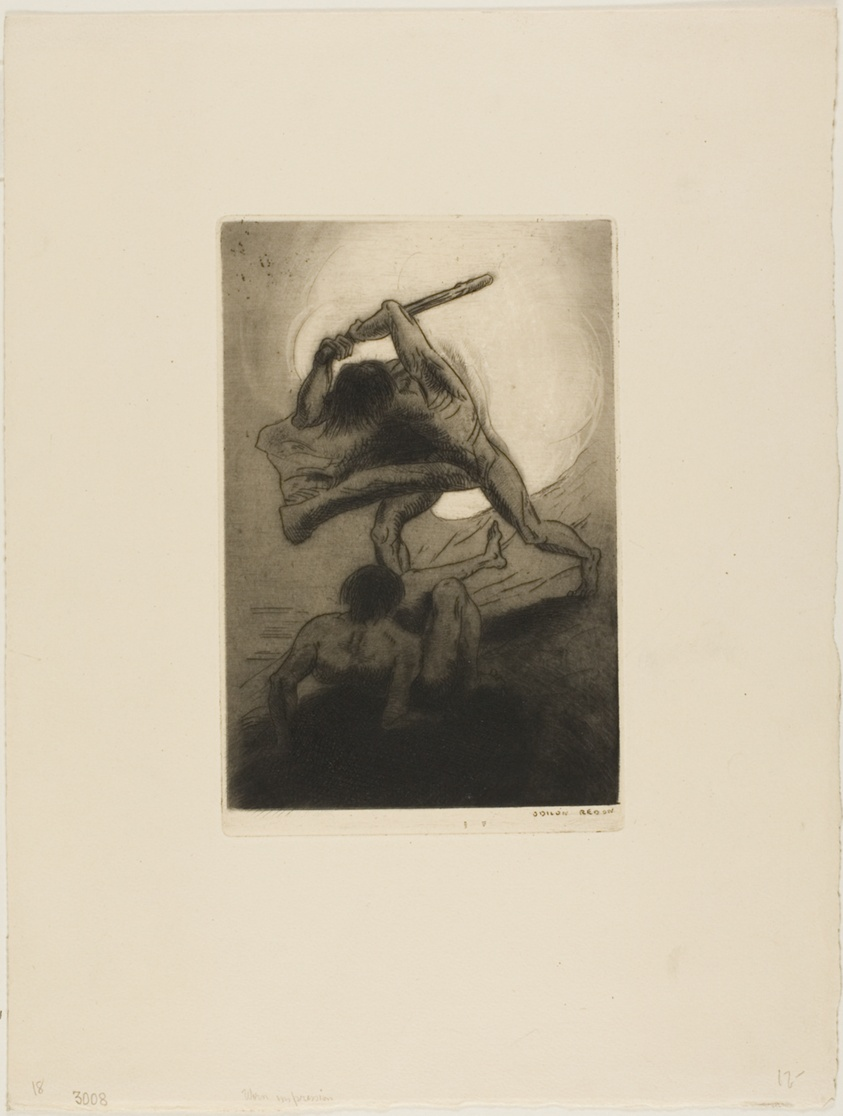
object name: Print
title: Cain and Abel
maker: Odilon Redon (French, 1840-1916)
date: 1886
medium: Etching and drypoint on cream wove paper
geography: France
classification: etching; print; prints and drawing; paper